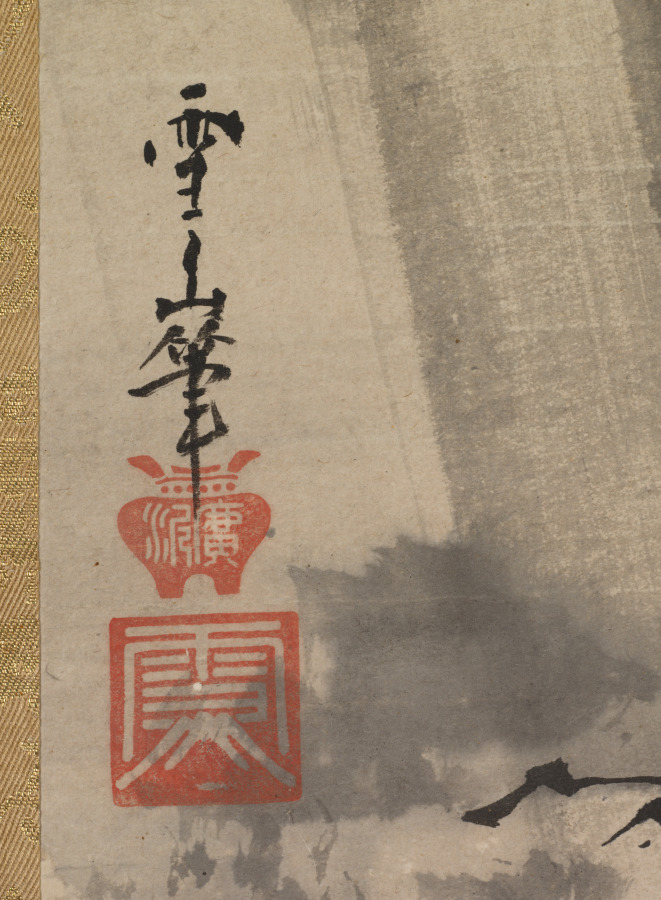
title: Mountain and River in Storm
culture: Japan, Edo period (1615–1868)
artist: Hirowatari Setsuzan (Japanese, ?-1674)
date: early to mid-1600s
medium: hanging scroll; ink on paper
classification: Painting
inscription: signed: Setsuzan hitsu